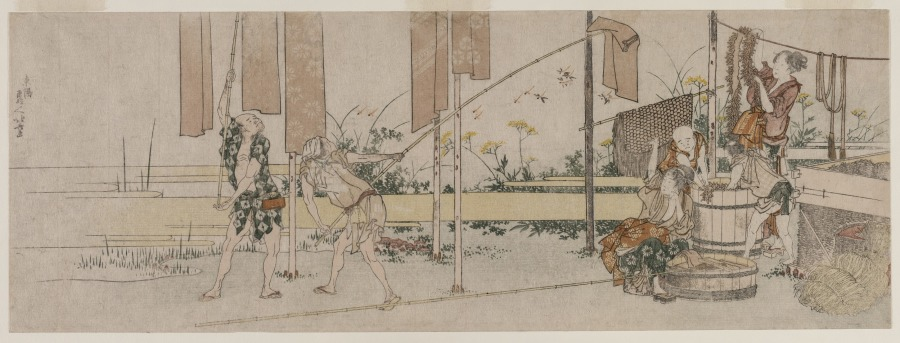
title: Dyers at Work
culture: Japan, Edo period (1615–1868)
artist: Katsushika Hokusai (Japanese, 1760–1849)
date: c. 1800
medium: color woodblock print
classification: Print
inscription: Signature: Toyo Gakyojin Hokusai ga